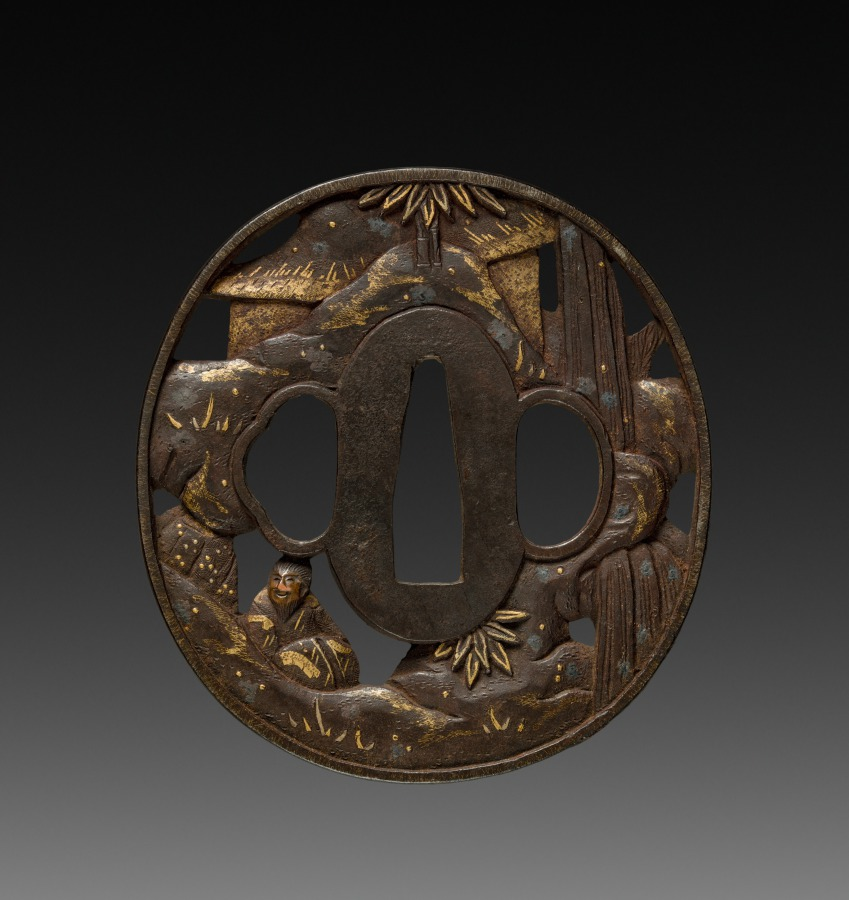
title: Sword Guard (Tsuba)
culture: Japan, Edo period (1615–1868)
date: 1800s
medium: bronze or steel; gilt details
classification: Metalwork